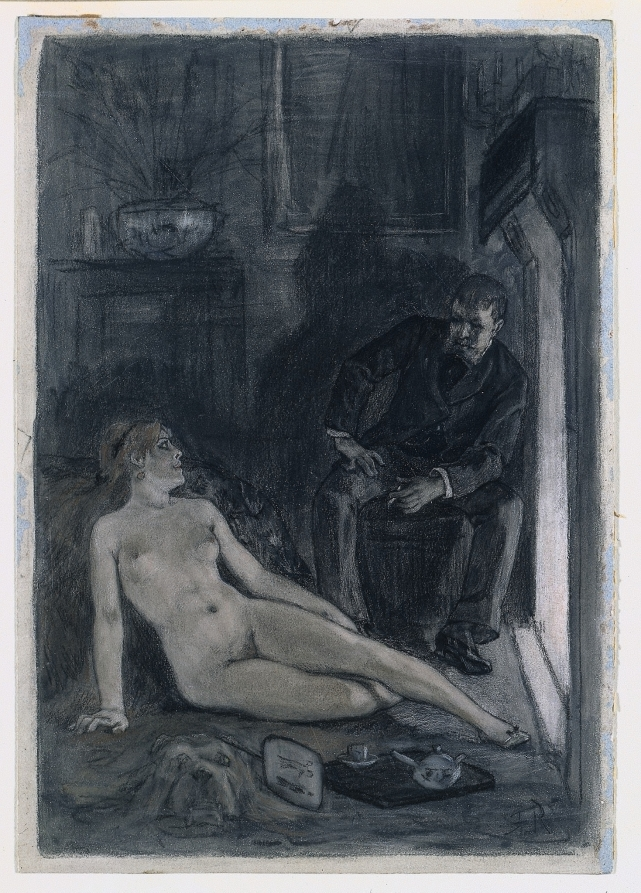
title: Winter Evening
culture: Belgium, 19th century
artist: Félicien Rops (Belgian, 1833–1898)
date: last third 19th century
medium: black crayon, black chalk and graphite (stumped and scraped away in places) and brush and gray wash and crayon, heightened with white chalk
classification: Drawing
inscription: signed, lower right, in black chalk: [artist monogram: FR] ; VERSO OF SECONDARY SUPPORT, upper center, in graphite: No [underlined] X ; upper center, in graphite: 1.carte [illegible] / teinte ancienne / Genre III mais plus etroite / [illegible] ; center, in graphite: 31 + 24. / 891. ; lower left, in graphite: F Rops / - / "Soirée d'Hiver" [underlined] / Collection Holtzer / N° [o underlined] Y de la Vente de 12 et 13 Nov 1896. / (dessin ombré H. 0.22. L. 0.15) / - / Dessin reproduit (d'après une photo) / á la page 143 du volume / de lemonnier "Felicien Rops" / Floury 1908. / sous la designation "Femme couchée" ; lower right, in graphite: 64